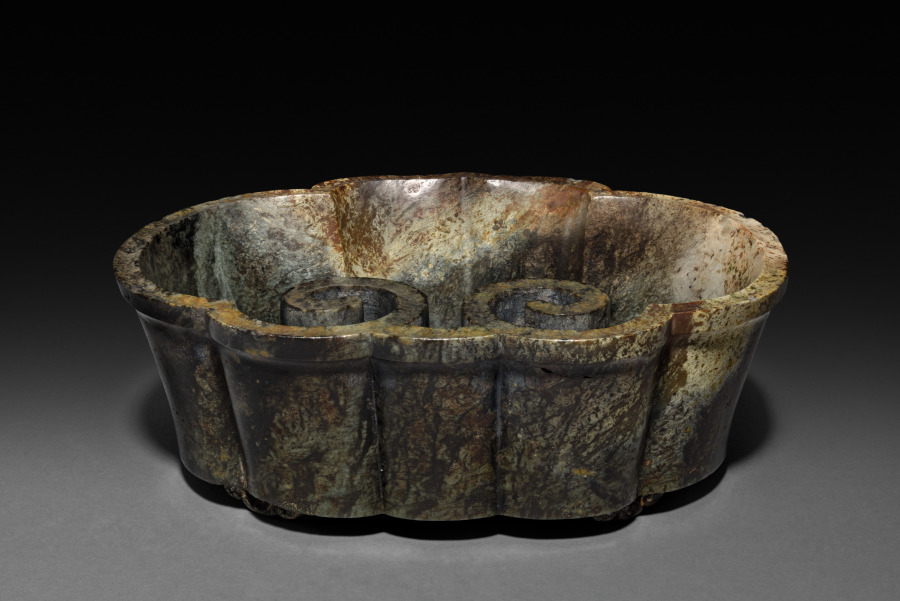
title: Fish Bowl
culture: China, Song dynasty (960-1279) or later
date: 960–1279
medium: jade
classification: Jade